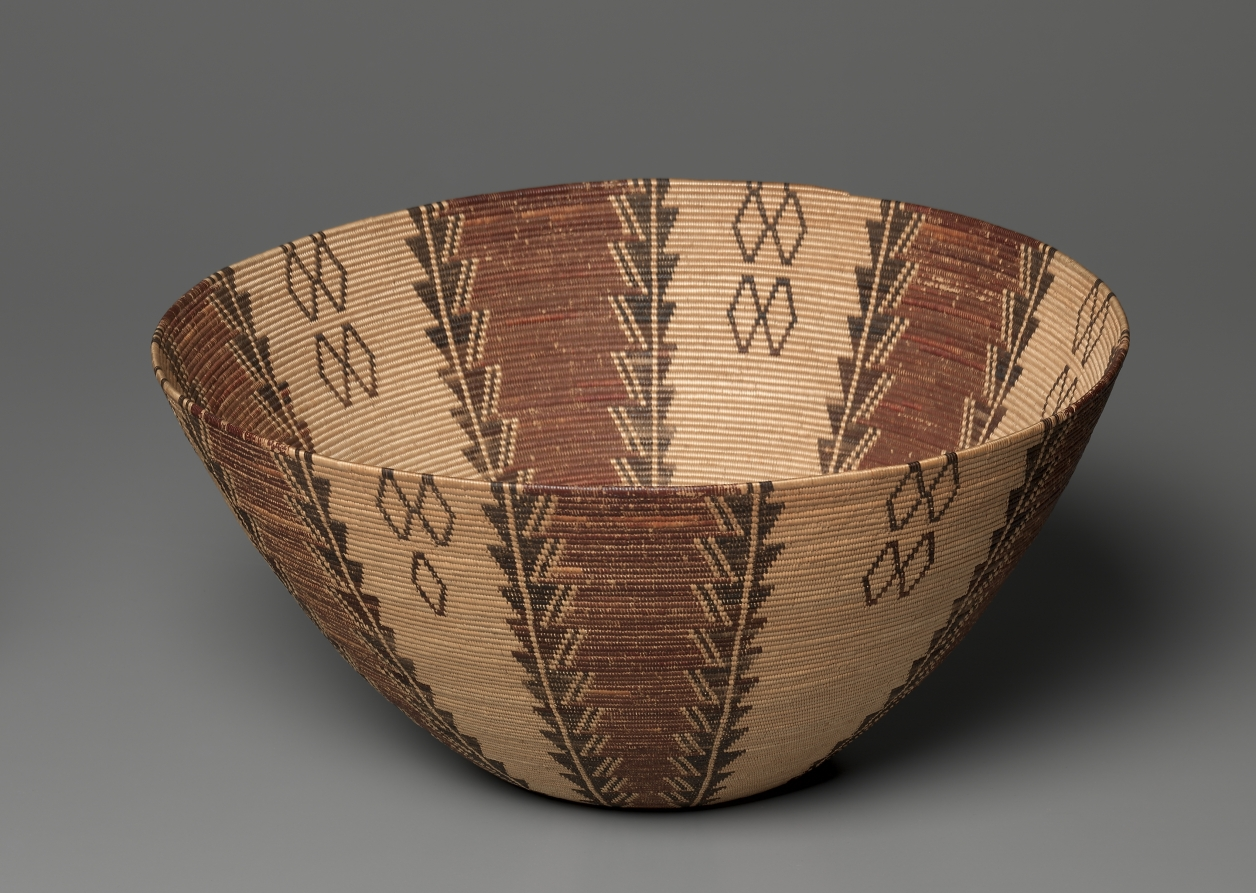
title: Presentation Bowl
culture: Native North America, Great Basin, California, Death Valley, Timbisha (Panamint) Shoshone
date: 1900–1905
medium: Willow, devil's claw, yucca root; coiled ( 3 rods)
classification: Basketry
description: This basket was made for the Euro-American collectors’ market in the early 1900s but it is modeled on basketry bowls from which the Timbisha (Panamint) Shoshone once served food. When used indigenously, the main view would have been of the interior. Made-for-sale baskets testify to Indigenous women’s truly creative, resilient responses to forces that endangered their livelihoods and existence.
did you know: This basket mingles 19th-century design features with 20th-century innovations, including the construction method.